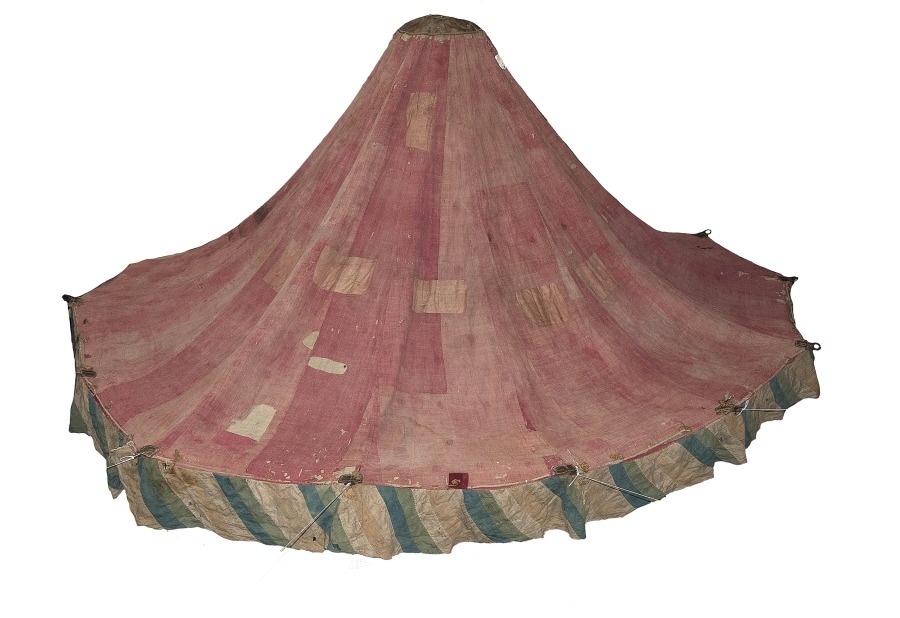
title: Royal Round Tent made for Muhammad Shah (Roof)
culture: Iran, Rasht, Qajar period (1779-1925)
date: 1834–48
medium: Interior: wool: plain weave, inlaid work; silk: embroidery, chain stitch; tape, leather; Exterior: cotton, wool: plain weave; rope, iron ring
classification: Textile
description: Royal tents were potent symbols of authority, wealth, and power throughout the greater Middle East. Rulers owned thousands of tents. They were used for shelter, shade, and innumerable functions in tent compounds that were essential for imperial ceremonies, travel, and military campaigns. Distinguished by size with elaborately decorated interior walls and ceilings, tents could be as large as castles. Opulent tents were also presented as imperial gifts. Tents are only known through documents before 1600. For example, in Baghdad in 809, Caliph Harun al-Rashid owned 4,000 ceremonial tents and 150,000 camping tents that were stored in the imperial Abbasid treasury. An astonishing variety and quantity of tents were housed in the royal Fatimid tent storeroom in Cairo in 1068-69, including "military tents, fortress tents, and castle tents, manufactured of . . . gold-brocaded stuff embroidered with designs of elephants, wild beasts, horses, peacocks, birds." Since 1600, Ottoman Turkish tents with elaborate floral decoration have been preserved in Istanbul in the Topkapi Palace Museum and Military Museum, and in European collections as war booty, primarily from the Ottoman Turks' attempt to conquer Vienna in 1683. These tents are not done in the Rasht technique, but rather are applique. In contrast, royal tents from Iran are extremely rare. This spectacular ceremonial tent is embroidered with the name of its owner, Muhammad Shah, who ruled Iran from 1834 to 1848 during the Qajar dynasty. The radiant jewellike interior features exuberant flora, blossoming vines, and robust birds made with colored wool embellished with silk-thread embroidery.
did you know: Rasht work is named after the city on the Caspian Sea in present-day Iran, which was a major silk trade center with numerous textile workshops.